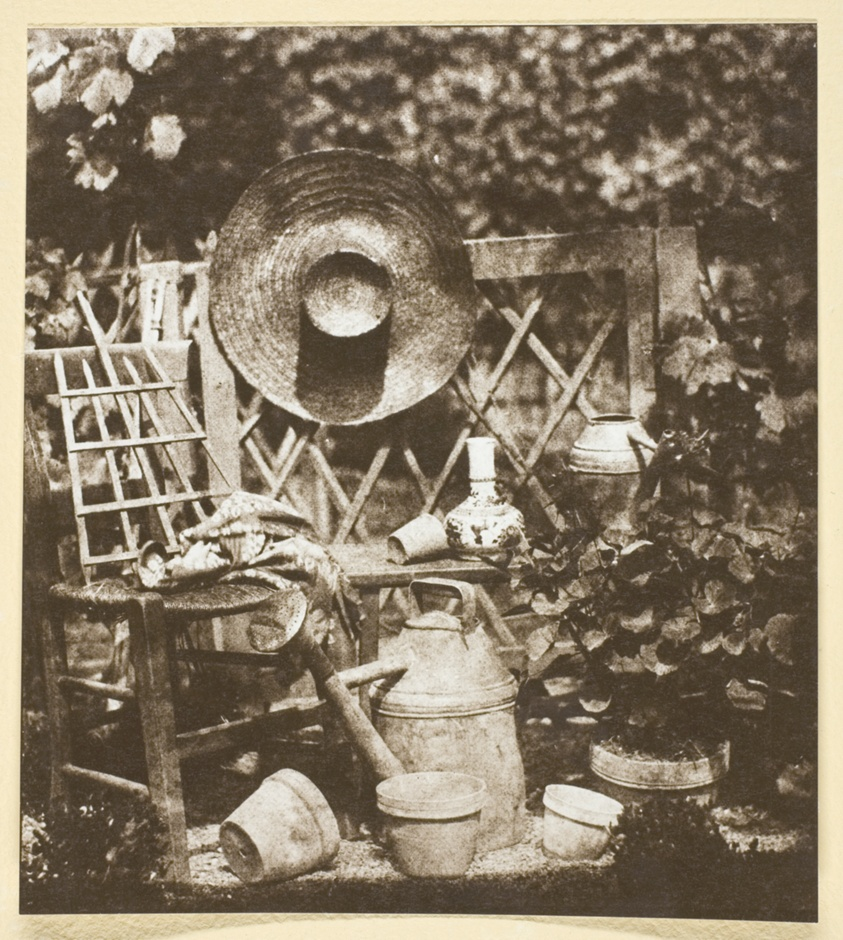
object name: Photograph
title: Composition au chapeau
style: 19th century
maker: Hippolyte Bayard (French, 1801–1887)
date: c. 1842, printed 1965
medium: Gelatin silver print, No. 7 from the portfolio "Bayard: XXV Calotypes, 1842-1850" (1965)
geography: France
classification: photographic process; photography; photograph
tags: Collected by Hugh Edwards